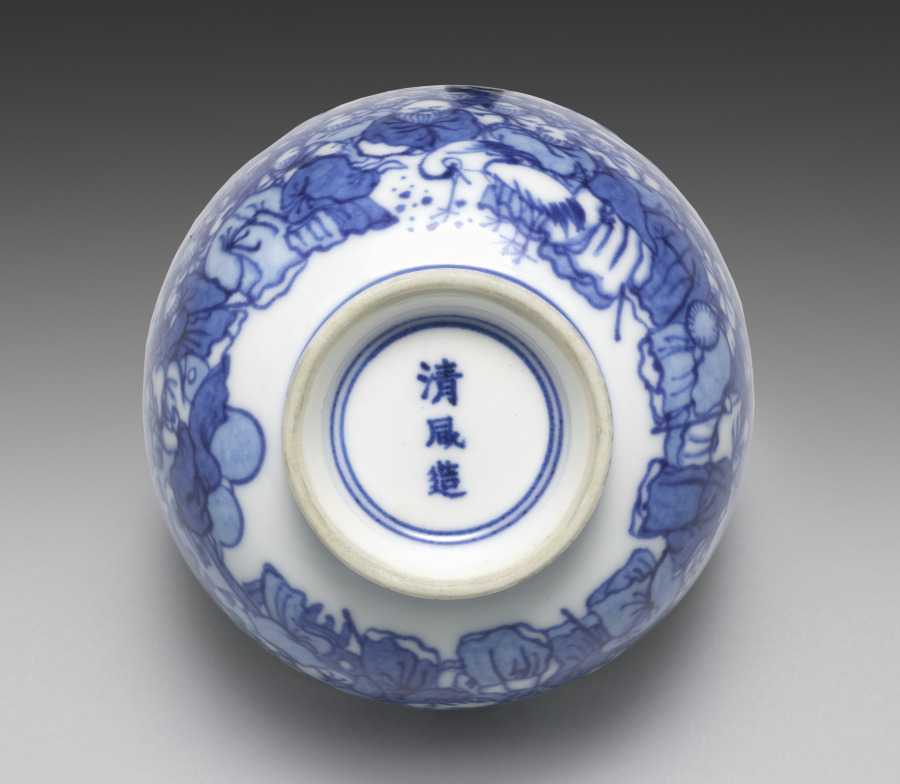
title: Teacup from Teacups with a Hundred Sages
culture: Japan, Meiji period (1868–1912)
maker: Seifū Yohei III (Japanese, 1851–1914)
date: 1893–1914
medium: One from a set of five teacups; porcelain with underglaze blue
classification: Ceramic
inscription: 清風造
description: Each of these five teacups has a painting of identical design in underglaze blue, but as the tiny figures are drawn entirely by hand, each cup has its own personality. The theme of the sencha cups is an assembly of sages or immortals, literally “a hundred venerable [people]” (hyakurō). The myriad figures crowd the scene in groups. The god of longevity, with his tall forehead, sits with his cranes, having flown in from Mt. Penglai on the Isle of the Immortals. Seven long-bearded sages sit around a stone table, chatting and drinking; one is seated on an enormous gourd. Of course, there is a stack of books on the table, and elsewhere, scrolls are being written upon or read—in one case held very close by a sage who is wearing glasses. The design was enormously popular in ceramics made for those engaged in literati culture.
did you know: Seifū Yohei III (1851–1914) produced many works for tea gatherings where people drank Chinese-style leaf-tea (sencha).